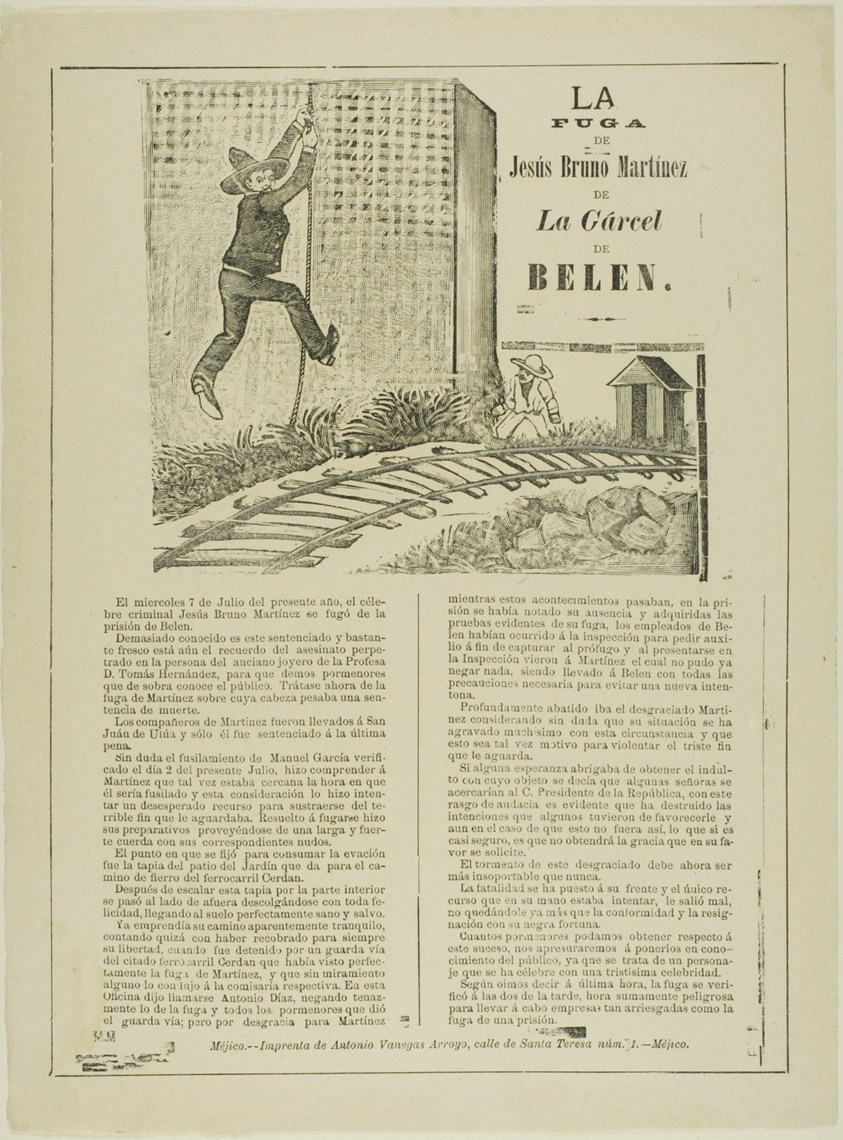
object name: Print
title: The Escape of Jesus Bruno Martinez from Belen Prison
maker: José Guadalupe Posada (Mexican, 1852-1913)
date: 1892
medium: Relief engraving or photo relief etching on wove paper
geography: Mexico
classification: woodcut; print; prints and drawing